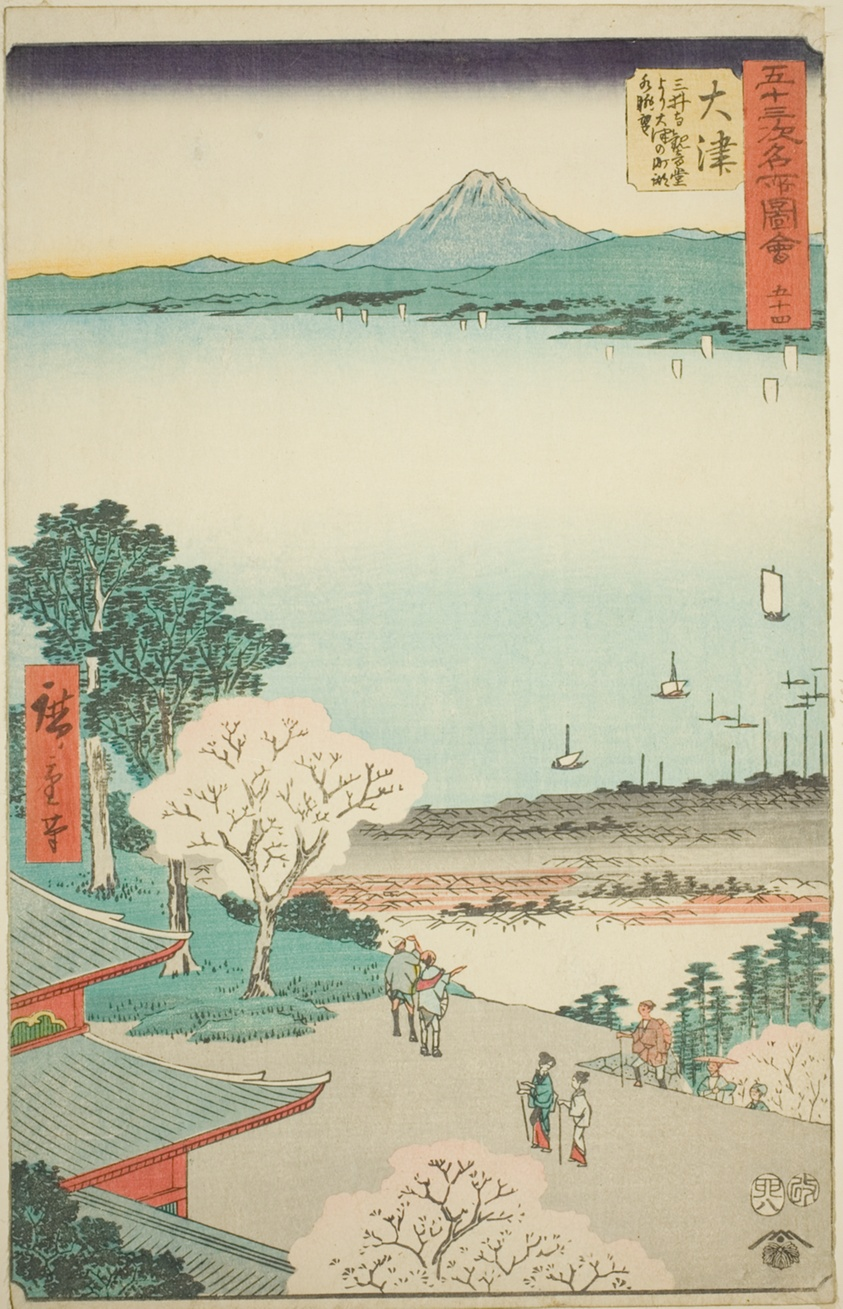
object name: Print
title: Otsu: Distant View of Otsu and the Lake from the Kannon Hall of Mii Temple (Otsu, Miidera Kannondo yori Otsu no machi kosui chobo), no. 54 from the series "Famous Sights of the Fifty-three Stations (Gojusan tsugi meisho zue)," also known as the Vertical Tokaido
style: Japanese (culture or style)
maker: Utagawa Hiroshige 歌川 広重; Japanese, 1797-1858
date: 1855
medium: Color woodblock print; oban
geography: Japan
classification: woodblock print; print; asian art